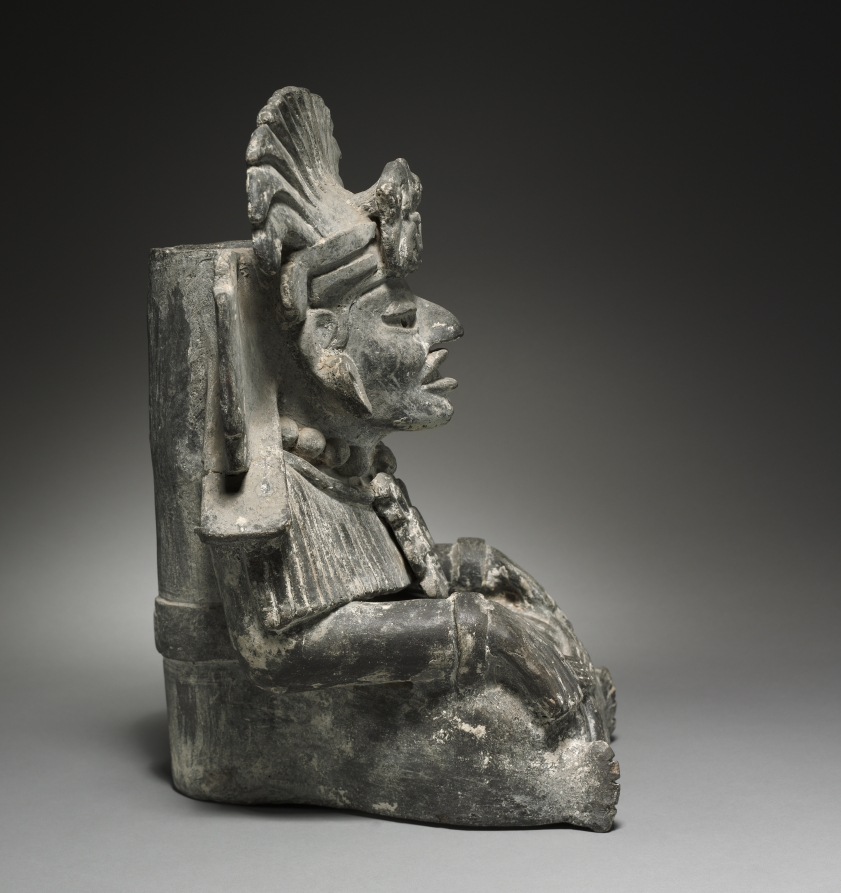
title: Effigy Urn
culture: Mexico, Zapotec, Monte Albán IIIB style, 20th century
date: 1900s (Thermoluminescence date, after 1930)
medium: gray pottery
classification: Sculpture